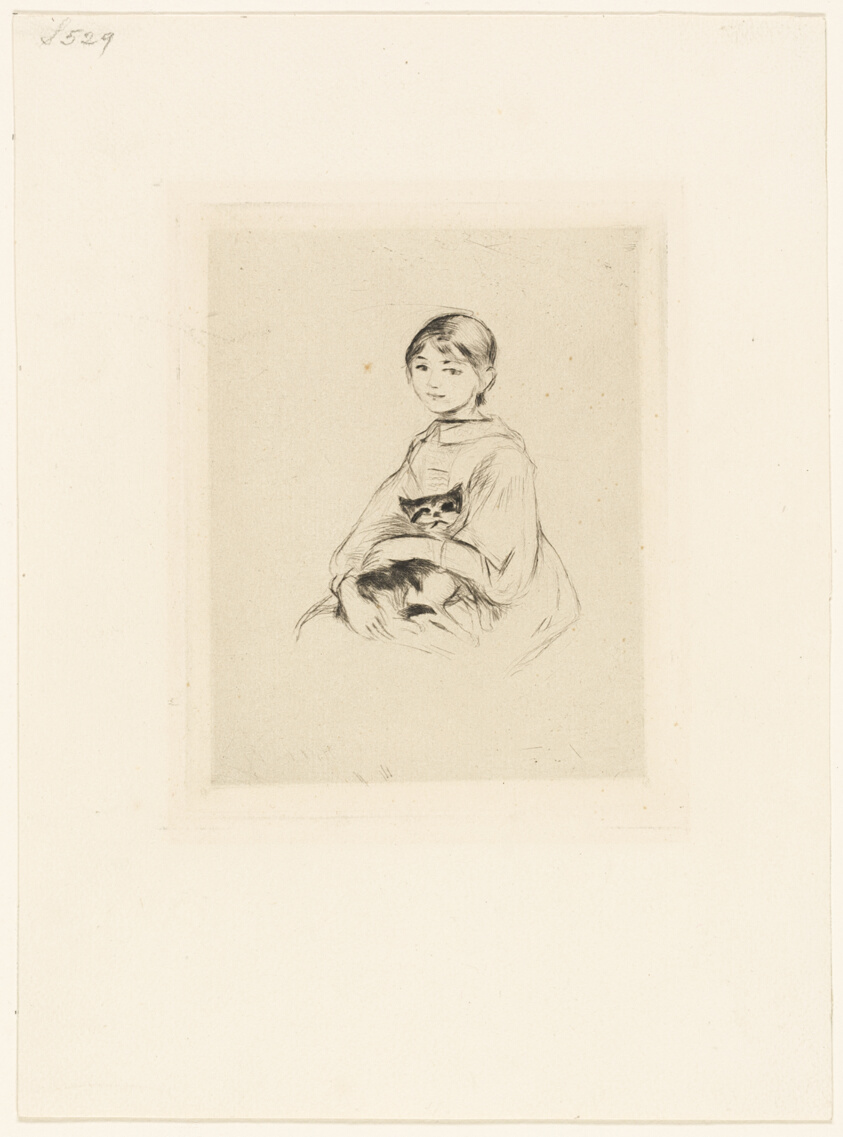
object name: Print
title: Young Girl with a Cat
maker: Berthe Morisot (French, 1841-1895); printed by Ernest Rouart (French, 1874-1942)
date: 1889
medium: Drypoint in black on cream laid paper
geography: France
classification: drypoint; print; prints and drawing